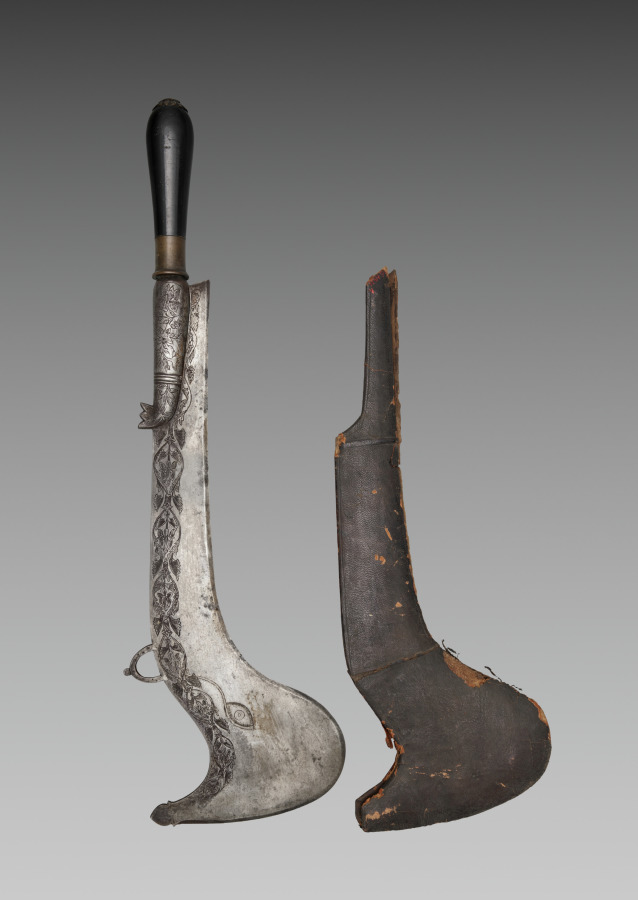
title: Knife or Axe (Kharga)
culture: Nepal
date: 1800s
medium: iron with wooden handle and leather scabbard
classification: Arms and Armor